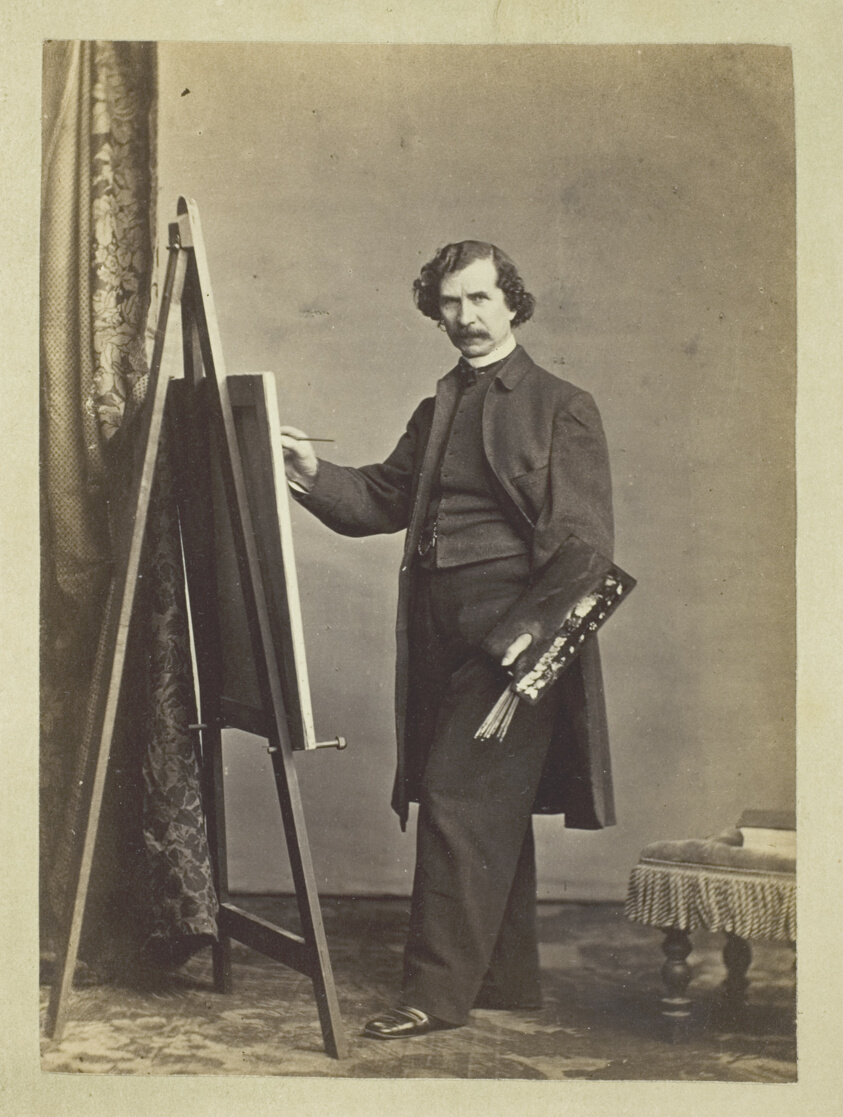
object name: Photograph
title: George P. A. Healy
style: 19th century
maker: Artist unknown; English, 19th century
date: 1855/65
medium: Albumen print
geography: England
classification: albumen silver print; photographic process; photography; photograph